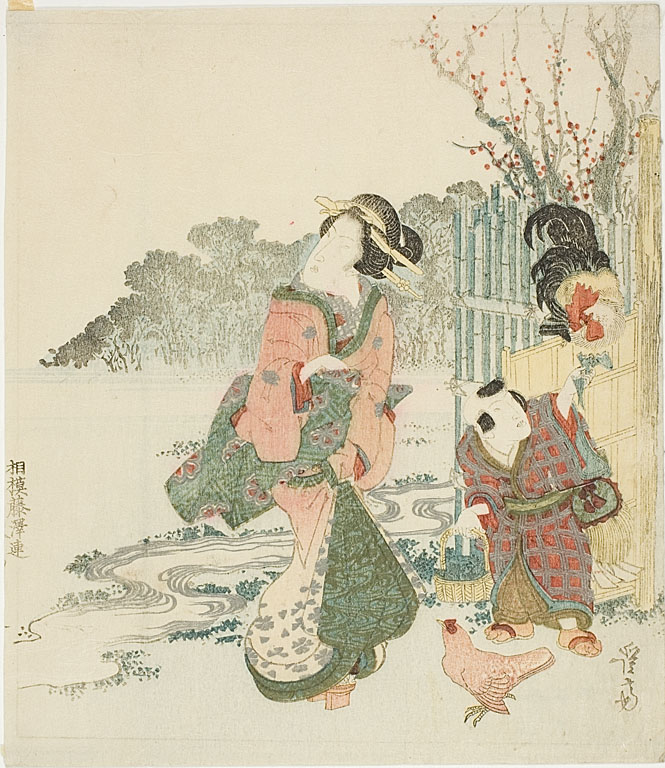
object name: Print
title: Feeding the Rooster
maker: Keisai Eisen (Japanese, 1790–1848)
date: 19th century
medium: Color woodblock print; surimono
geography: Japan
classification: woodblock print; print; asian art